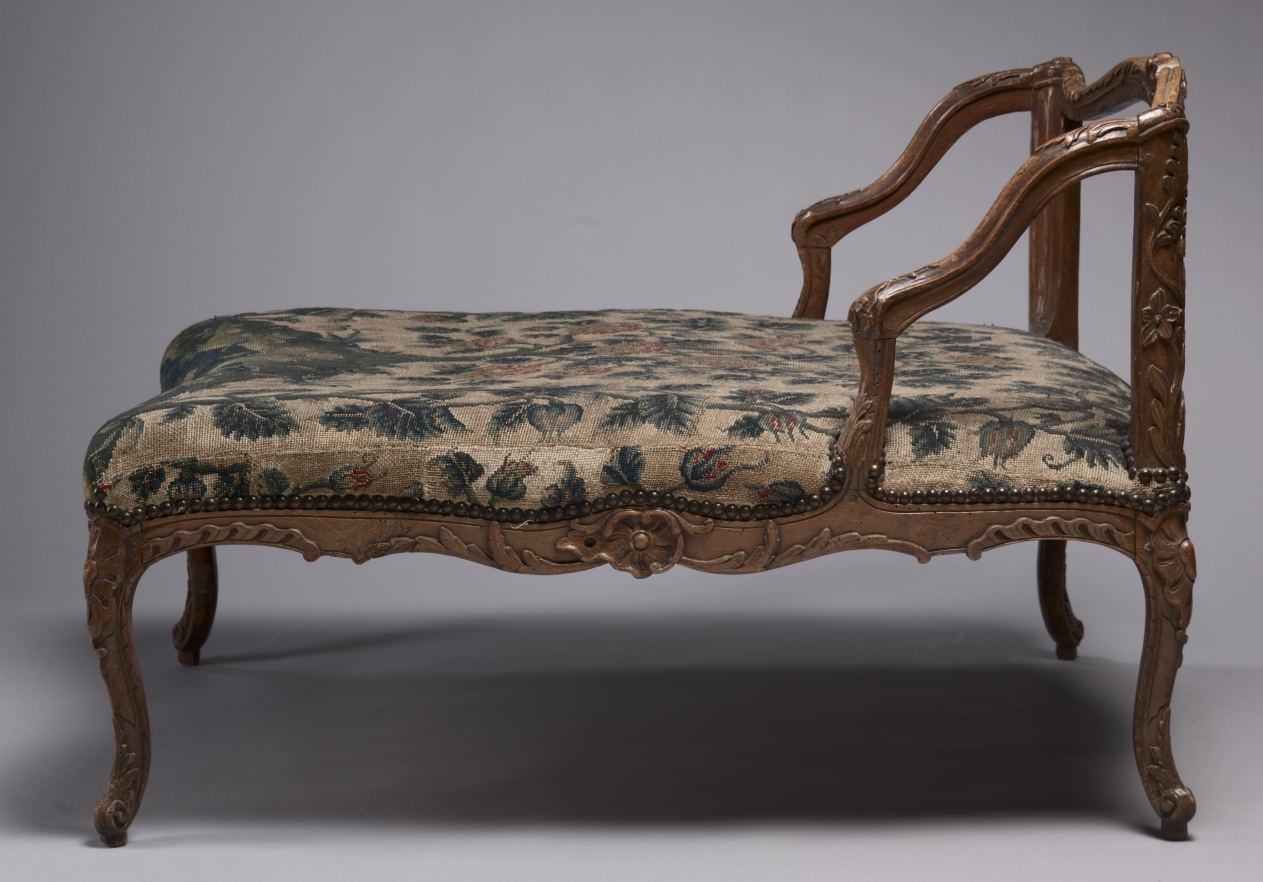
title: Chaise Lounge (Stool)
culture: France, style of Louis XV, 20th century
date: c. 1890–1940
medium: carved wood frame upholstered in needlework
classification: Furniture and woodwork